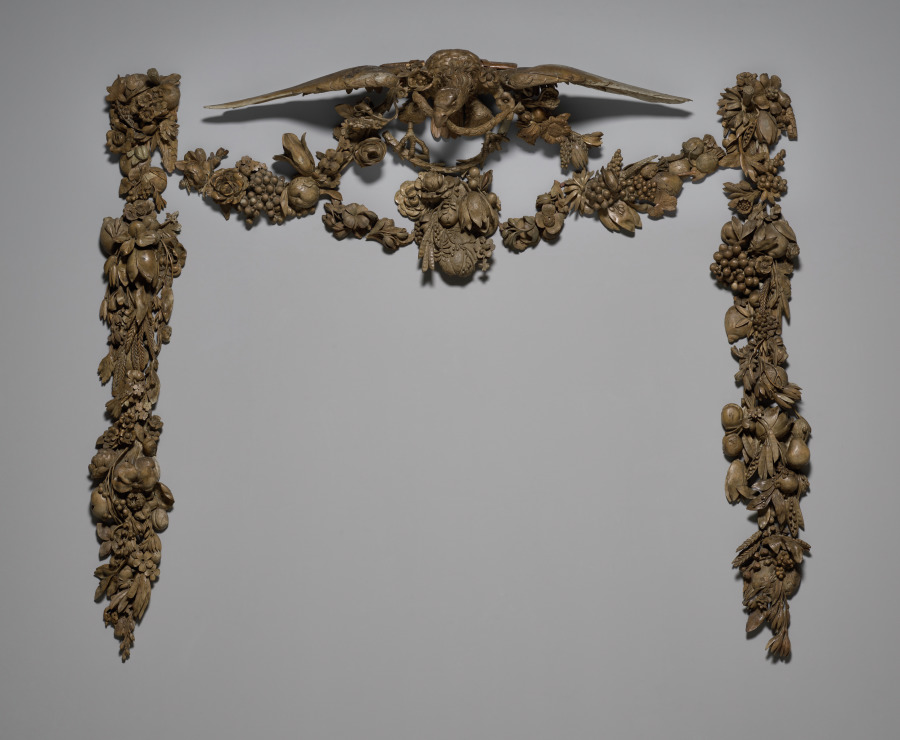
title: Overmantel Decoration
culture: England, 17th century (Charles II)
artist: Grinling Gibbons (British, 1648–1721)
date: c. 1675–77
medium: lindenwood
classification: Sculpture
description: The arrangement of architectural elements within grand interior spaces in the late 1600s and early 1700s emphasized symmetry and height. Decorative elements such as elaborately carved mantels, mirrors, paintings, and applied wall decorations were often stacked to achieve a visual focal point at one or both ends of the room. This particular overmantel decoration once hung above the fireplace in the Green Drawing Room of the Earl of Essex at Cassiobury in Watford, near London. In 1823, the British painter William Henry Hunt (1790–1864) produced a watercolor of the drawing room which featured this overmantel decoration. Grinling Gibbons was born in Rotterdam, the Netherlands, of English parents. After training there as an artist, he came to England in the 1660s and soon began to work as a sculptor of interior ornament, particularly in wood. One of his first large-scale decorative projects was the series of interiors at Cassiobury House.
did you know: The swags of fruit and foliage featured in this wooden overmantel decoration evoke the bounty of the English countryside.